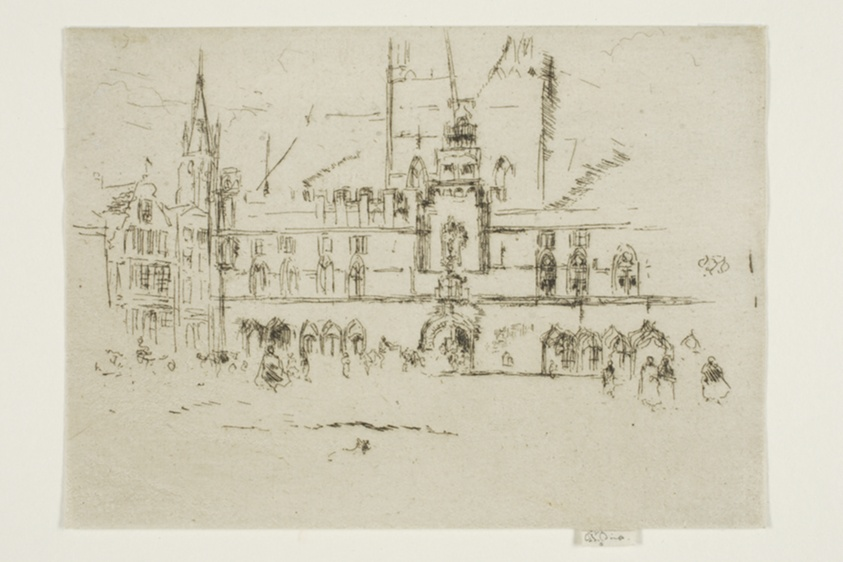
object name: Print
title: The Market, Bruges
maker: James McNeill Whistler (American, 1834-1903)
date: 1887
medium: Etching with foul biting in black ink on cream laid paper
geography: United States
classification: etching; foul biting; print; prints and drawing; paper